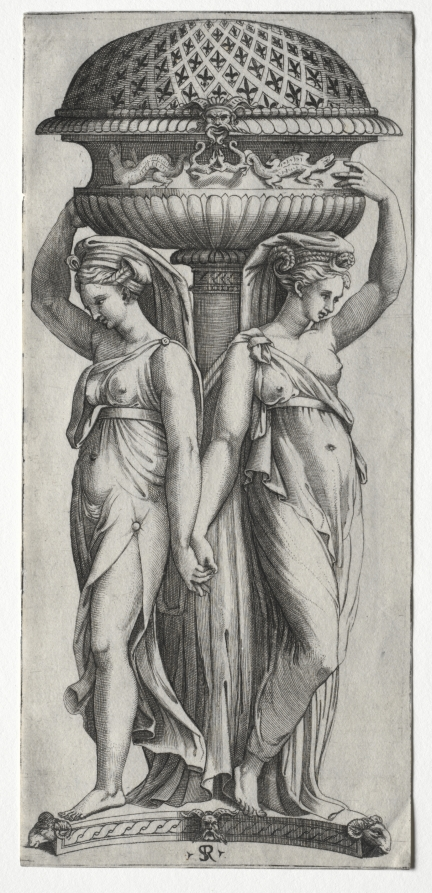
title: The Cassollette: Women Supporting an Urn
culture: Italy, 16th century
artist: Marco Dente (Italian, c. 1486–1527)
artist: after Marcantonio Raimondi (Italian, 1470/82–1527/34)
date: c. 1520–27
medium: engraving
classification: Print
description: Prints helped disseminate design ideas and establish a taste for decorative objects and styles, especially when endorsed with royal insignia. Adapted from Greek architecture, two caryatids—draped female figures used as pillars—hold aloft an ornamental incense burner designed by Raphael about 1515–20 for King François I (reigned 1515–1547). The lily-shaped fleurs-de-lis on its lid allude to the French monarchy. The salamanders adorning the side of the vessel specifically refer to François I, who chose this amphibian as his personal emblem. According to legend, salamanders could survive fire, making them even more meaningful on a burner.